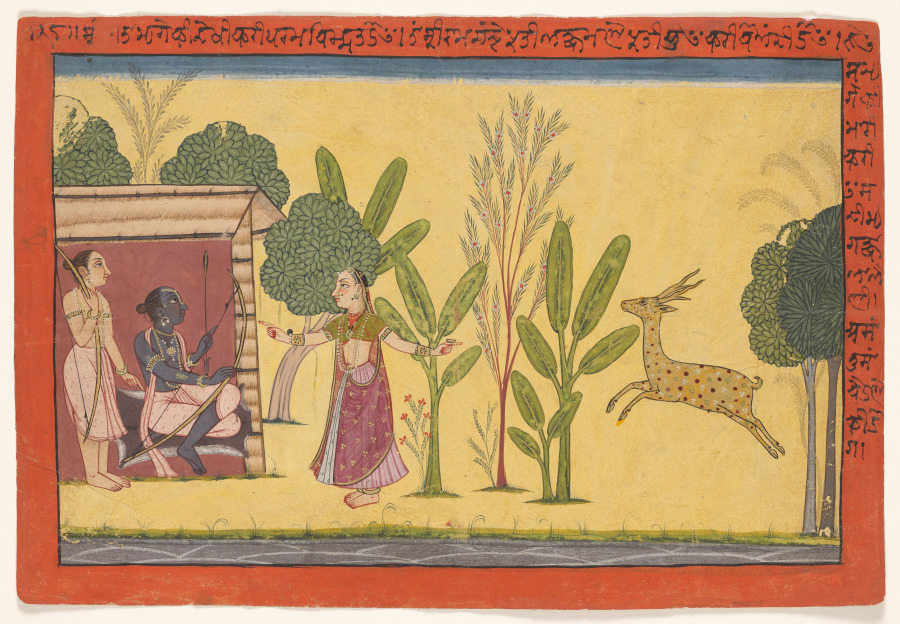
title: Sita asks Rama to fetch the golden deer, from the “Shangri” Ramayana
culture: Northern India, Pahari kingdoms, Himachal Pradesh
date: c. 1700–1725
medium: Gum tempera, ink, and gold on paper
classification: Painting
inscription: Recto: Mandiali Takri inscription in the margin on recto, quoting the passage from the Ramayana depicted in the painting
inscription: Verso: in Devanagari Araṇya 68; rewritten quotation of the Ramayana passage; Takri numbers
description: Sita exclaims to Rama, “What an exquisite deer! He has stolen my heart away. Please catch him for me, my great-armed husband. He shall be our plaything. . . . Never before have we seen an animal such as this. His body sparkles with different colors and is speckled with chips of precious stones; he illuminates the entire forest, for with his golden hide and horns of precious gems, he shows all the brilliance of the morning sun, all the luster of the starry heavens.” Lakshmana is suspicious and warns against having anything to do with the enchanting deer.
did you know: The spots on the golden deer show that it shimmers with multiple colors.